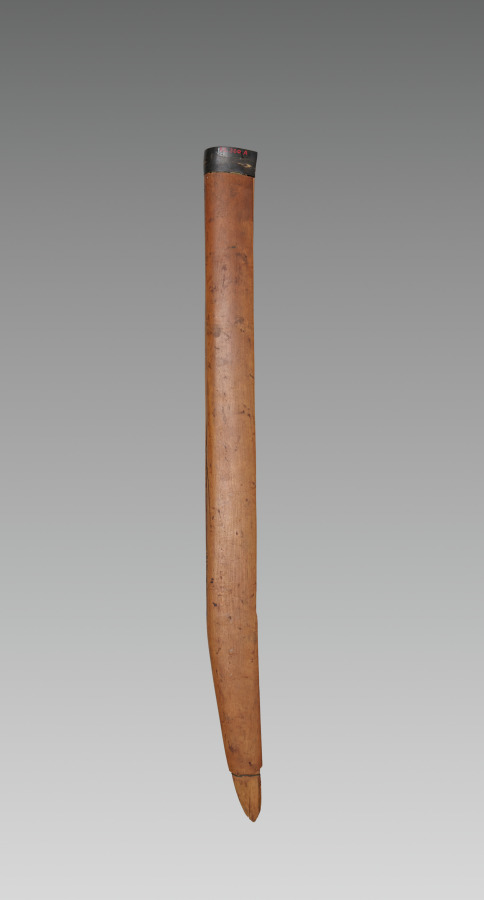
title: Sword and Scabbard (scabbard)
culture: Java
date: 1700s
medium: steel and ivory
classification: Arms and Armor